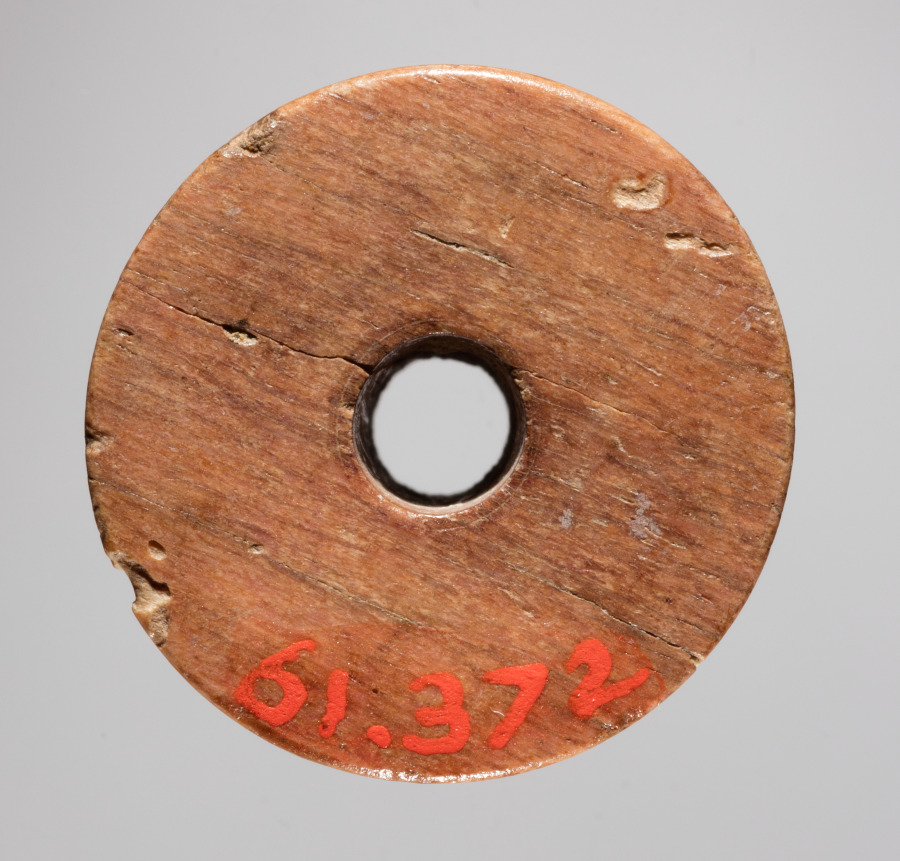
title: Spindle Whorl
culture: Iran, early Islamic period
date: 700s - 900s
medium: bone, incised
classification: Spindle Whorl